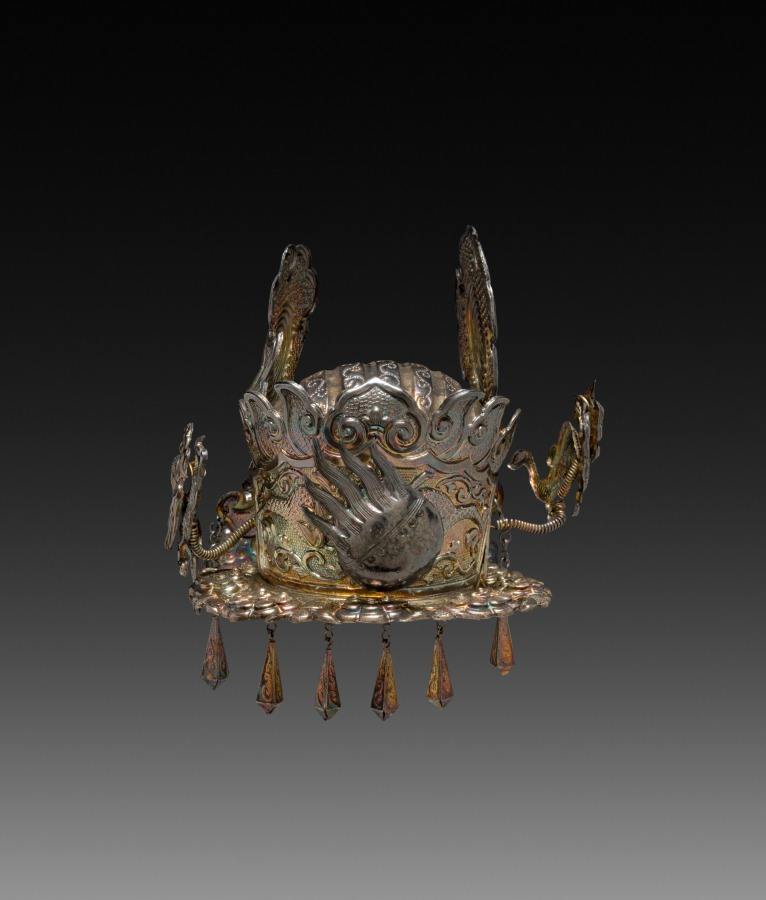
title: Model of a Hat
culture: China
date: early 1900s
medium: silver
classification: Metalwork